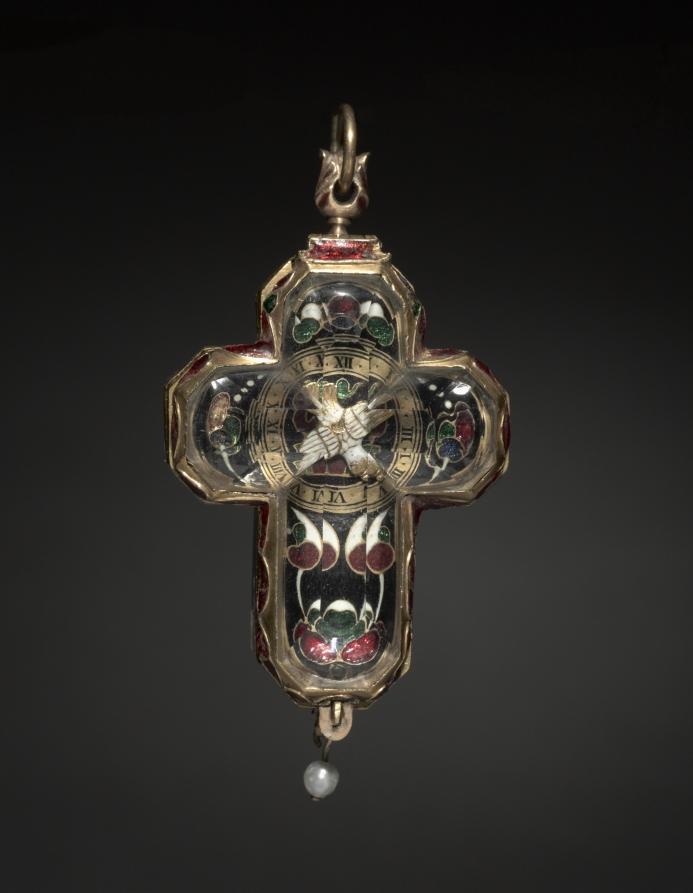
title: Cross-Shaped Clock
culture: France, 16th century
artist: P. Herbier (French)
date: c. 1580–1600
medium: enameled gold, rock crystal, and a pearl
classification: Jewelry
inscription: inscribed: P. Herbier, Grenoble.